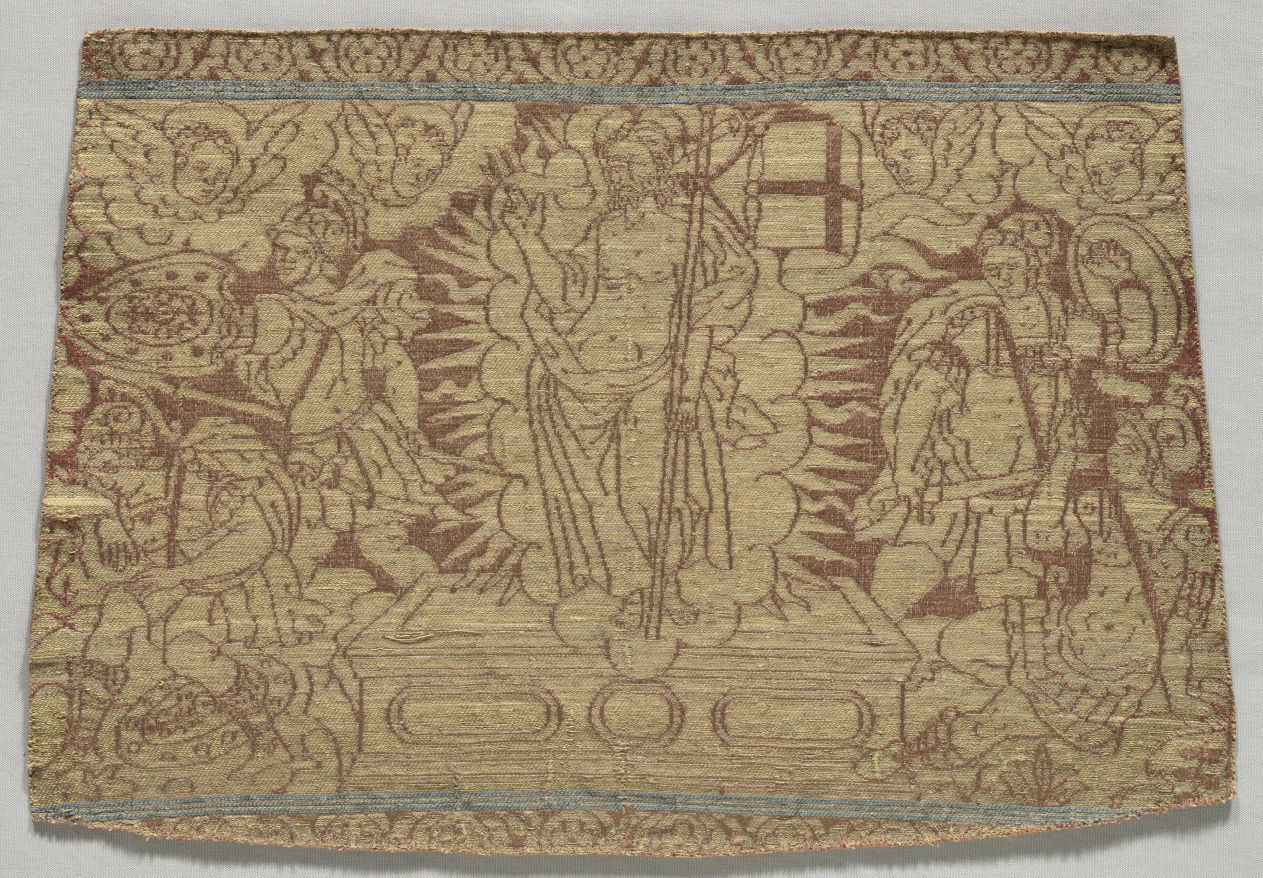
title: Fragment of Band Showing Resurrection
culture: Italy, Florence, 16th century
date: 1500s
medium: lampas weave, silk and gold thread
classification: Textile